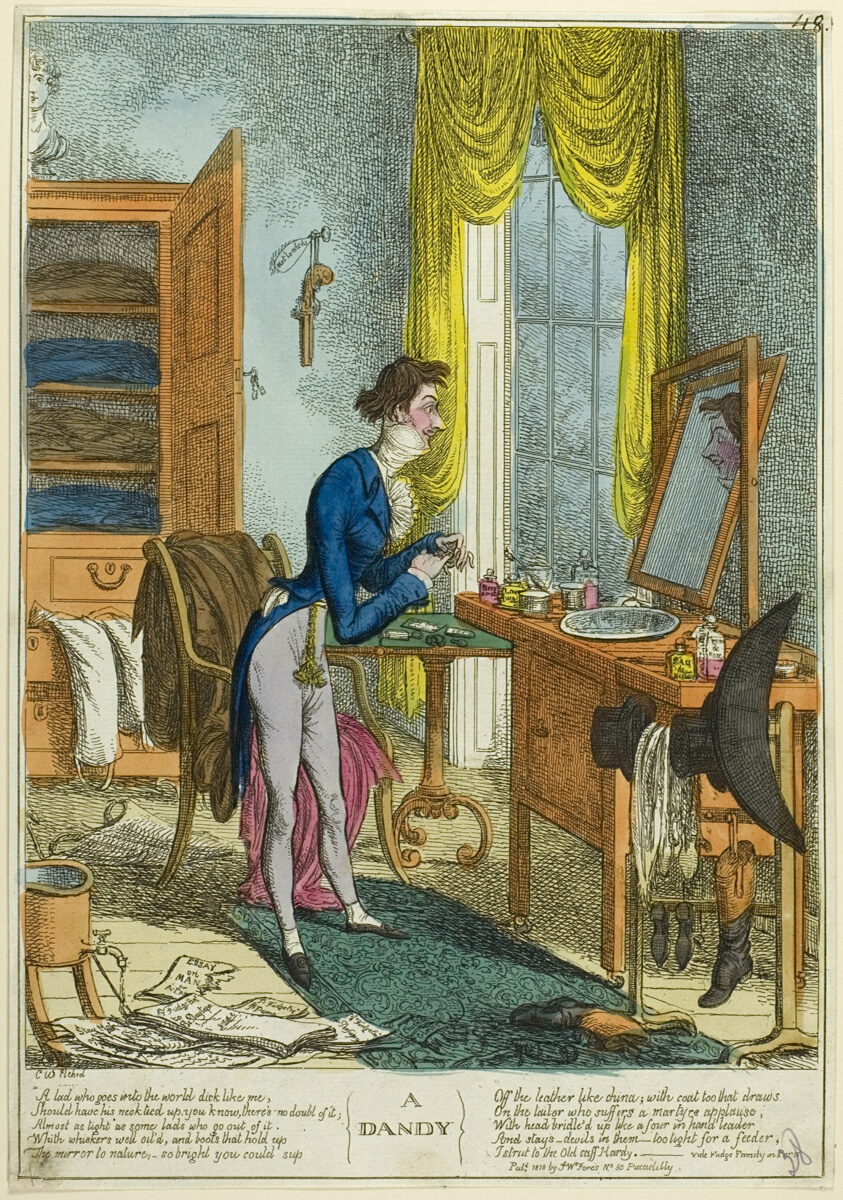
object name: Print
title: A Dandy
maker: Charles Williams (English, 1797-1830); published by S.W. Fores (English, 1761-1838)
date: published 1818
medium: Handcolored etching on ivory laid paper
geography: United States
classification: etching; print; prints and drawing